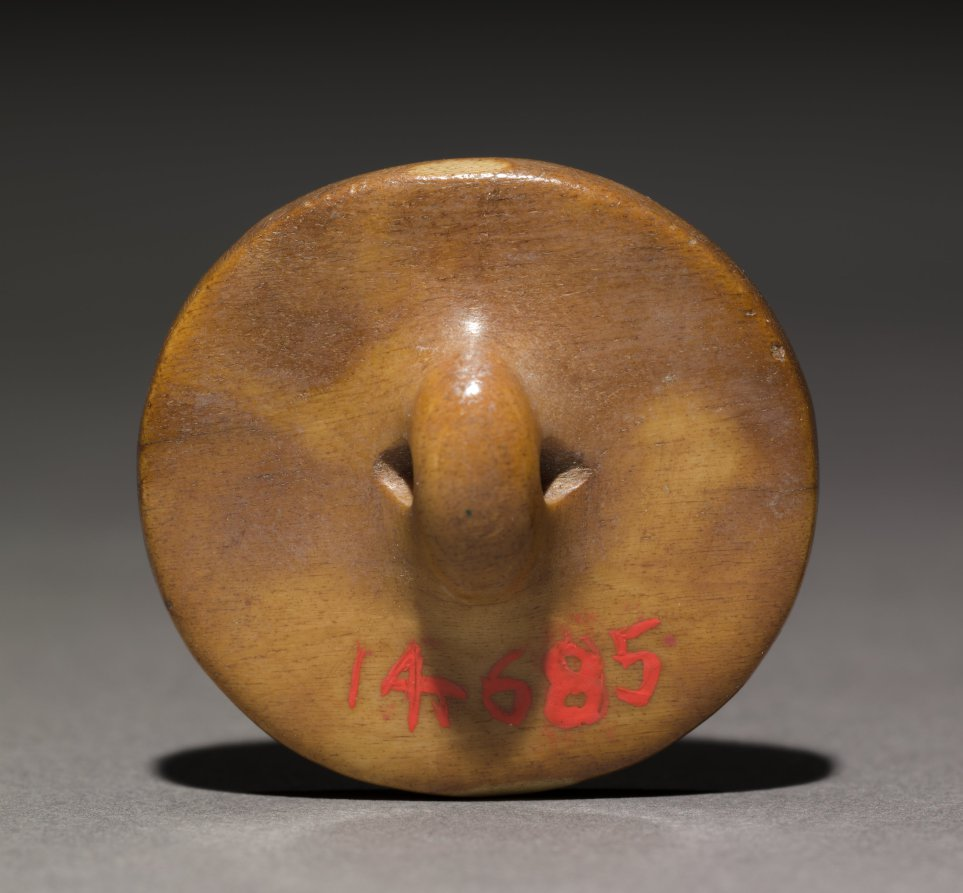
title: Seal Amulet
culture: Egypt, Old Kingdom (2647–2124 BCE), Dynasties 6–8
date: 2311–2124 BCE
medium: bone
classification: Amulets